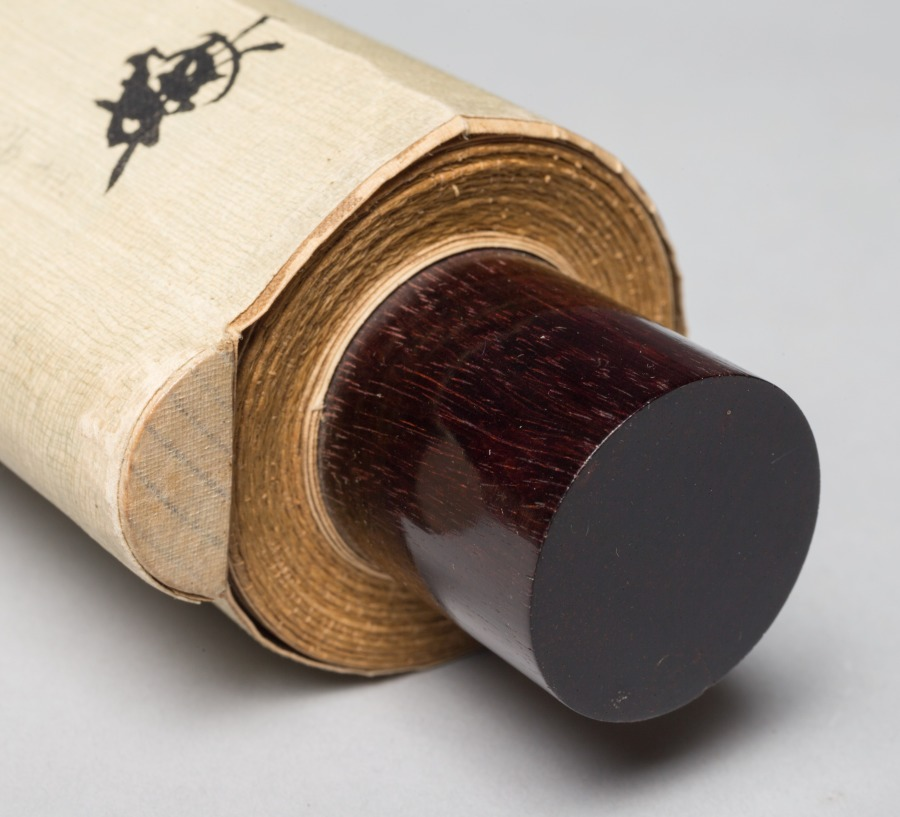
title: Summer Flowers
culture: Japan, Edo period (1615–1868)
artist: Kitagawa Sōsetsu (Japanese, active 1639–50)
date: mid-1600s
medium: hanging scroll; ink, color, and gold on paper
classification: Painting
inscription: 法橋相説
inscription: Seal: 印年 (Inen)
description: White hydrangea, orange-colored demon’s lantern, and greenbrier vine appear together in this scroll. The artist used the dripping-in (tarashikomi) technique to create a sense of depth and dimension in the leaves of the plants. A carefully controlled brush loaded with a high ratio of water to ink or color is key to the success of this brush method. Gold lines indicate the veins of leaves and the seams of pods.